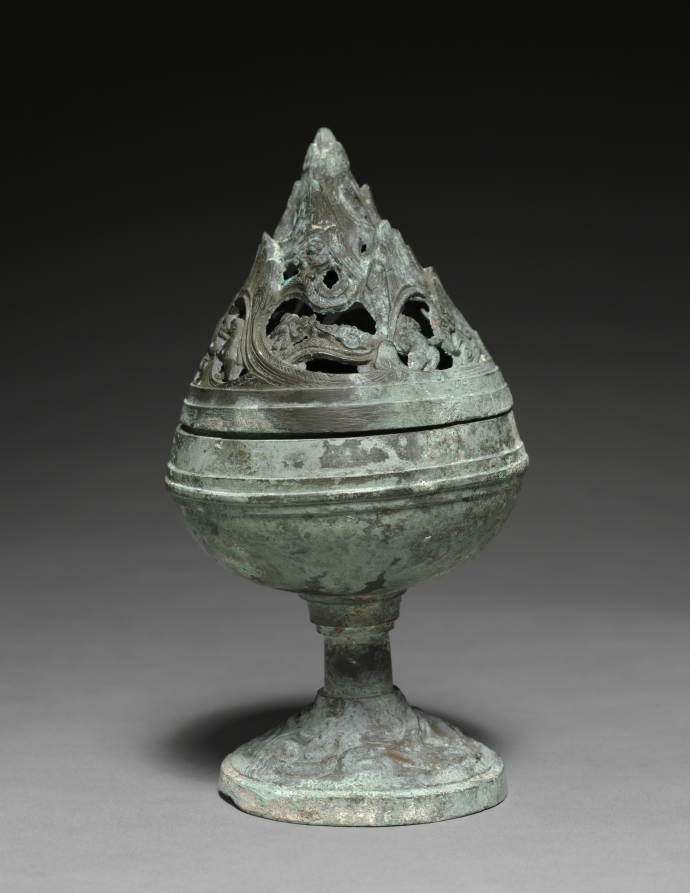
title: Incense Burner (Boshan Lu)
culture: China, Western Han dynasty (206 BCE–8 CE)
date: 200–100 BCE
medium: bronze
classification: Metalwork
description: The conical cover of this incense burner represents a miniature mountain with hunting scenes. The cover was shrouded in mist and emanated intoxicating smoke through its openwork when fragrant woods and herbs were burnt in its stem cup, transporting its beholder into an imaginative realm.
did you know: Deities (appearing as hunters) and fantastic beasts roam freely among mists and clouds on this incense burner.